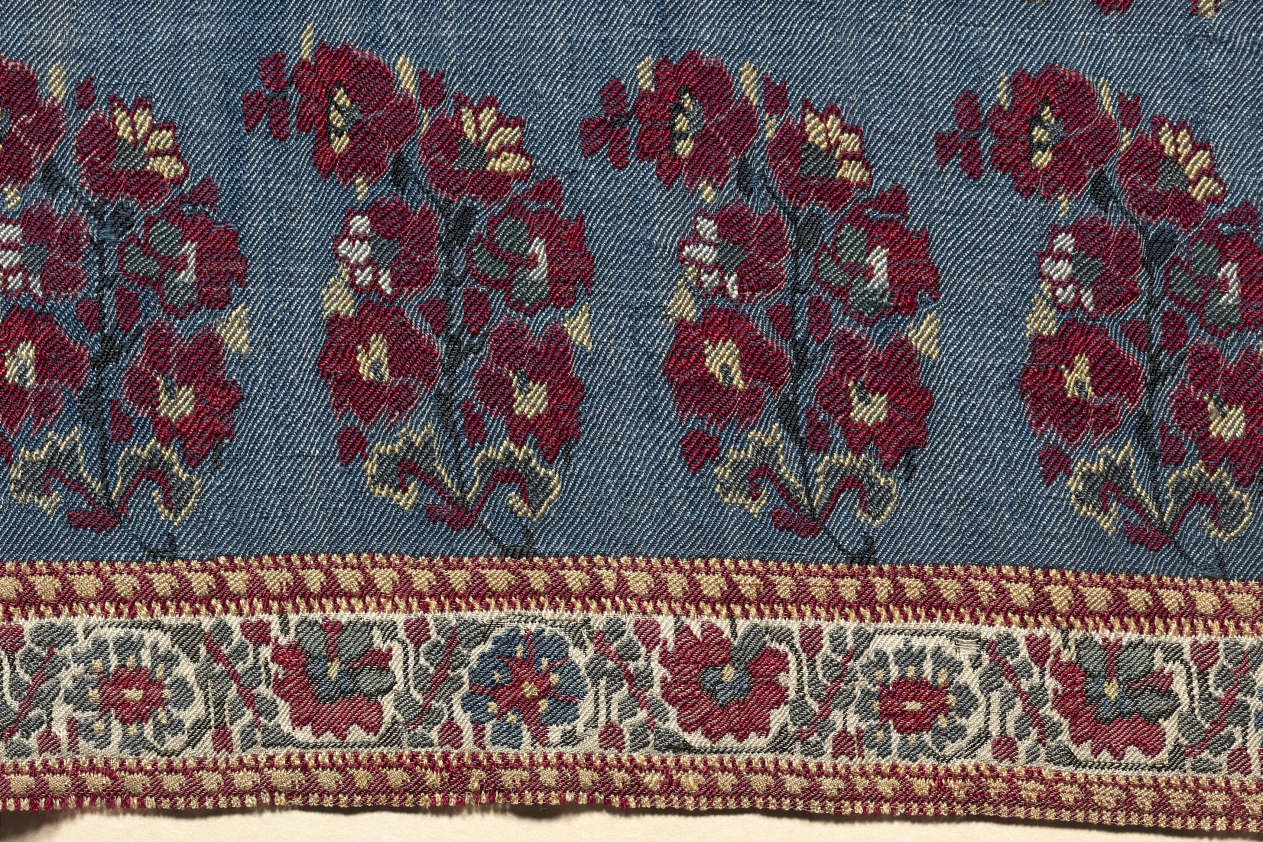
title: Shawl with boteh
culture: India, Kashmir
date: 1820–1830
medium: 2/2 twill tapestry weave, double interlocked: wool, possibly pashmina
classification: Textile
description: Thousands of luxurious shawls imported from Kashmir, India, were status symbols that European-manufactured imitations could not equal. Those woven in Paisley, Scotland, gave rise to the popular term paisley. Their representation in portraits records the evolution of shawl fashions, which helps to date surviving examples. The coveted quality of Kashmir shawls was achieved with luxurious fine goat hair woven in twill tapestry to form small colorful blossoms. Such shawls are lightweight, supple, and warm. A plethora of blossoms arranged in small vases on stands form the large paisley or boteh motifs, while smaller versions enliven the sides of the field. Such floral displays evolved from blossoming plants possibly in 16th-century India.